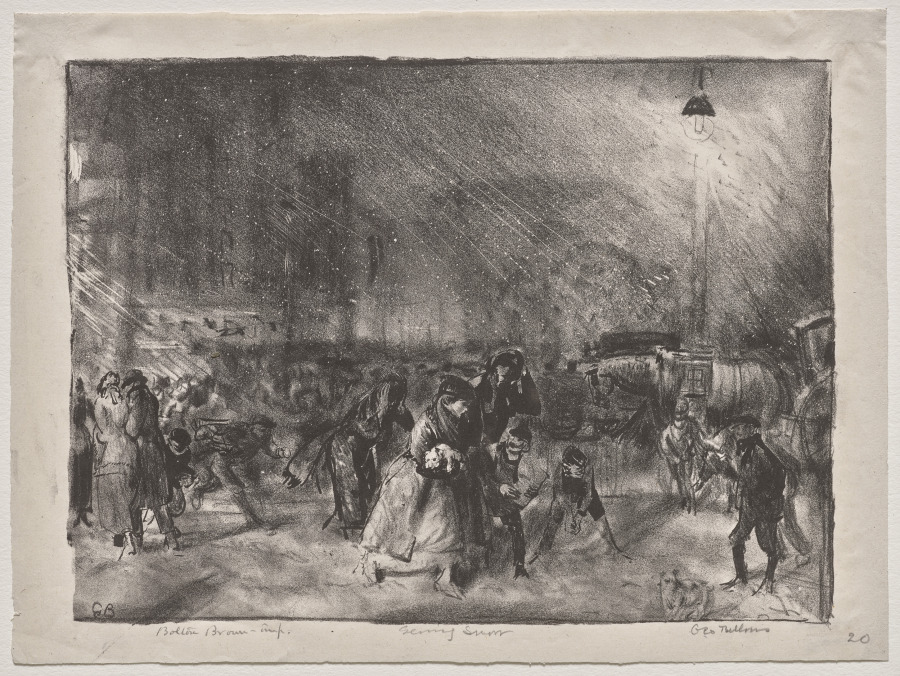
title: Evening Snow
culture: America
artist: George Bellows (American, 1882–1925)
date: 1921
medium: lithograph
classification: Print